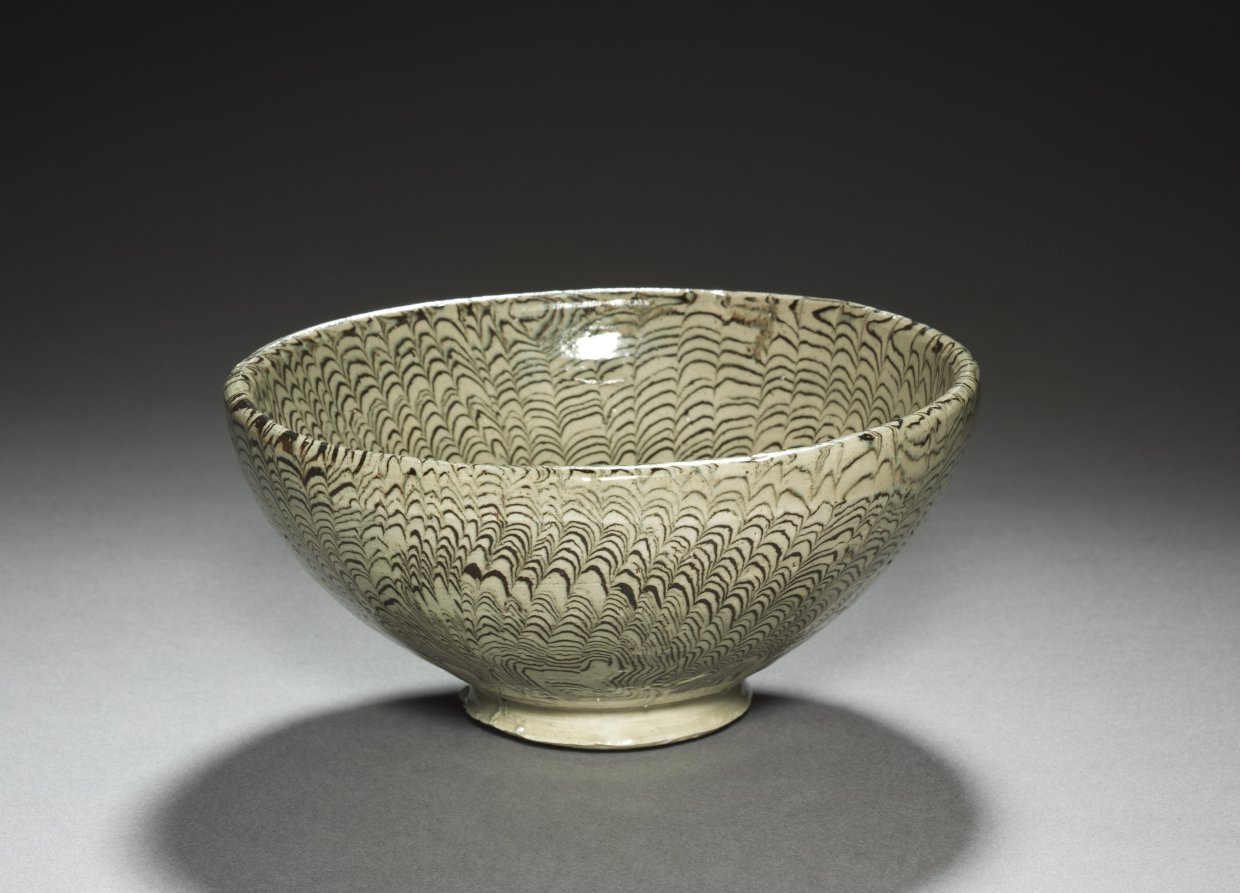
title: Marbled Bowl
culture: China, possibly Henan province, Xinwu, Dangyangyu, Northern Song dynasty (960-1127)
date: 1100s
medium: glazed stoneware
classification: Ceramic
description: This bowl was potted using the marbling technique called jiaotai (mixed clay), whereby light- and dark-colored clays are combined to create natural patterns, then covered with a transparent glaze. The marbling technique had been developed since the 8th century in imitation of the marbled glassware imported from Persia. Song marbled ware represented the continuation of the Tang tradition, achieving simplicity and vibrancy in aesthetic effects.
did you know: The marbling technique used to create this bowl imitates Persian marbled glass.